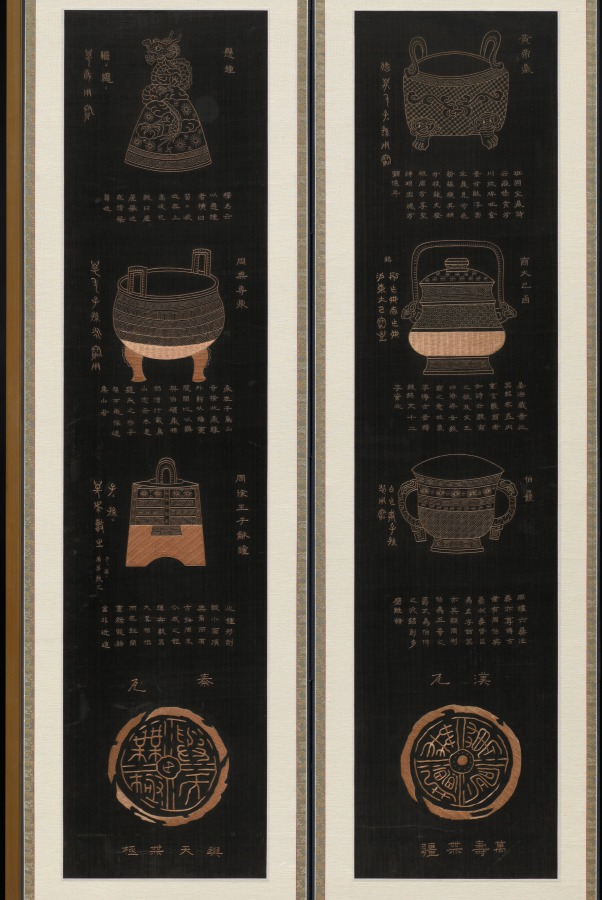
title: Ancient Chinese Bronzes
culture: Korea, Joseon dynasty (1392–1910)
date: late 1800s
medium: Ten-panel folding screen; embroidery, gold silk threads on black silk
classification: Textile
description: This embroidered folding screen depicts a set of bronze vessels. While the subject of bronze vessels is part of mainstream male elite culture, which centered on ancestral rituals, the written text that accompanies each bronze vessel expresses the idea of evoking good fortune and wishing for many children. The is perhaps related to the idea that those who diligently perform rituals for the spirit of ancestors could have all their aspirations realized.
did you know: The written text that accompanies each bronze vessel depicted in this embroidered screen expresses the idea of evoking good fortune and wishing for many children.